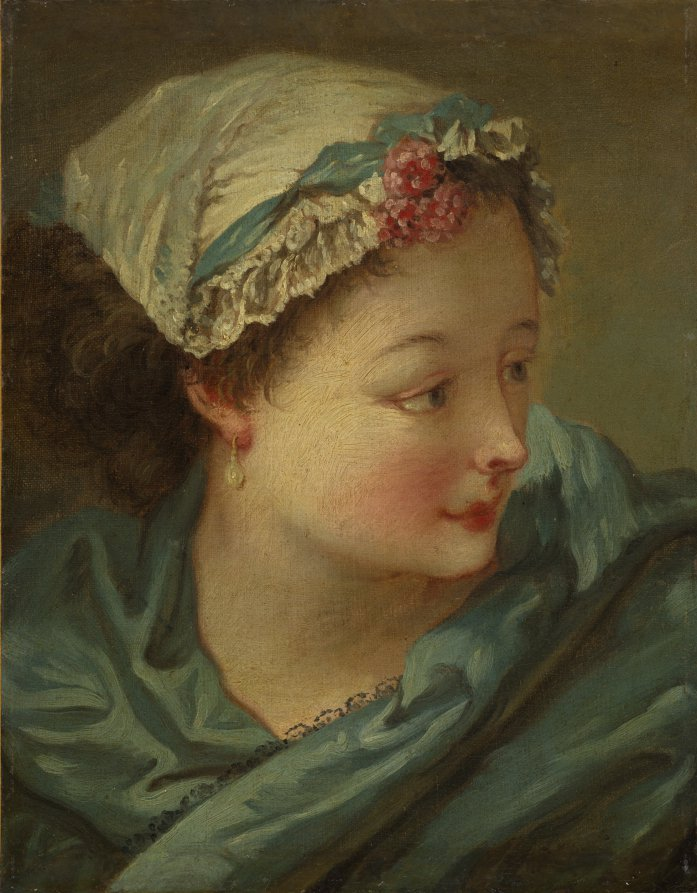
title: Head of a Young Woman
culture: France, 18th century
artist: François Boucher (French, 1703–1770)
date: early 1730s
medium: oil on canvas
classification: Painting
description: This work was catalogued as "style of Chardin" when it entered the museum's collection, and was considered a minor rococo revival work of the 1800s. In 2011, the museum asked Alastair Laing, the leading scholar of the artist Boucher, to study it. He confirmed that the painting is a rare survival from the artist's early career—one of only two known oil studies of this type by the artist.